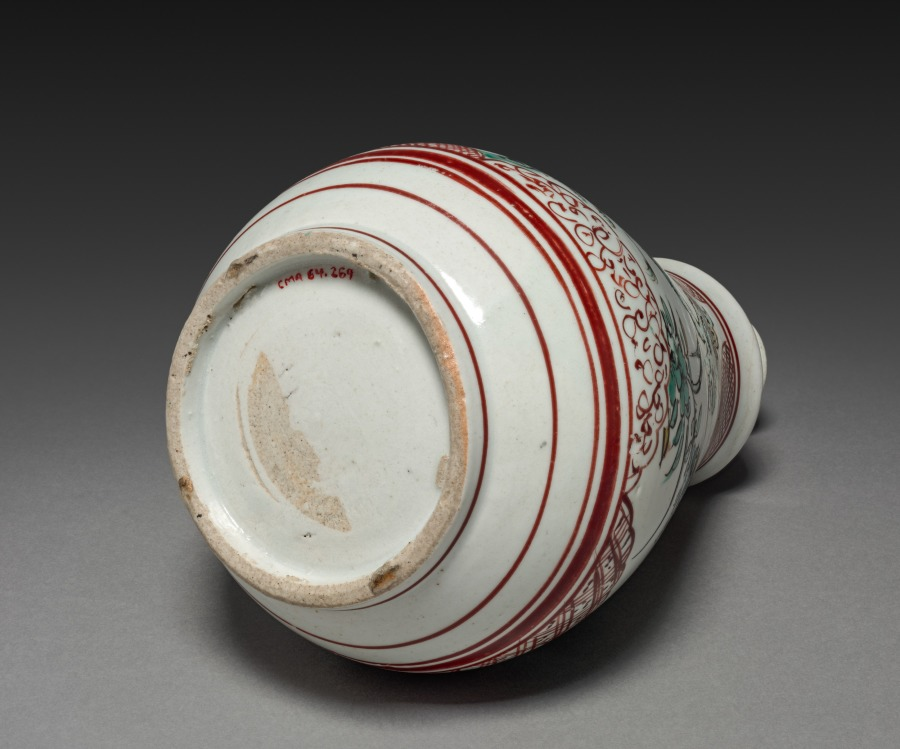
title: Wine Bottle with Plum and Pine Tree Design: Ko Imari Type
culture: Japan, Edo period (1615–1868)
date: late 1600s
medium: porcelain with underglaze enamel decoration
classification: Ceramic